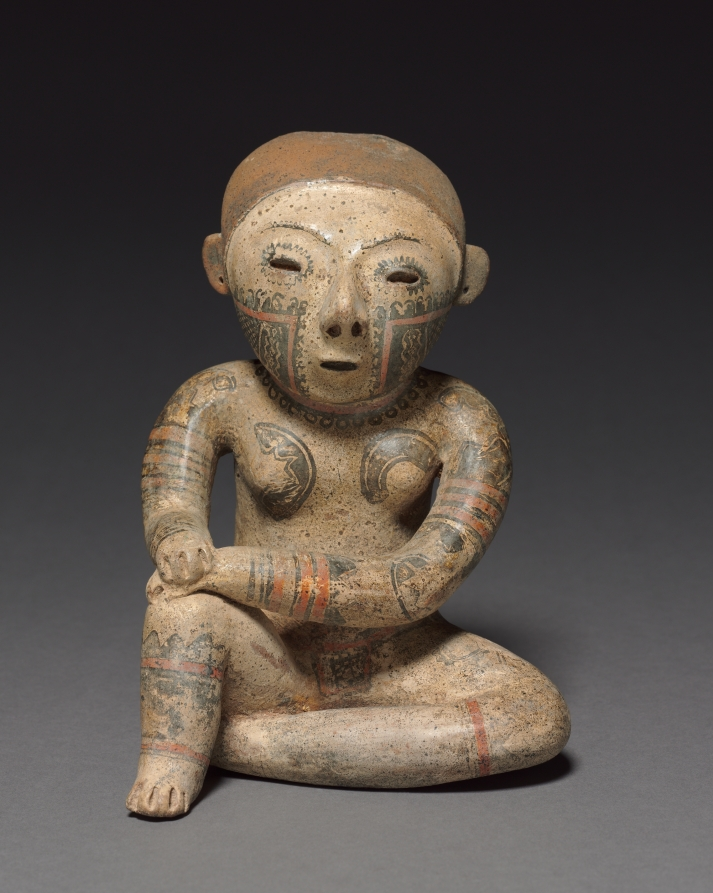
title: Seated Female Figure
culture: Mexico, Nayarit, Chinesco Style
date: c. 100 BCE–300 CE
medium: earthenware with burnished, colored slips and resist patterning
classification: Sculpture